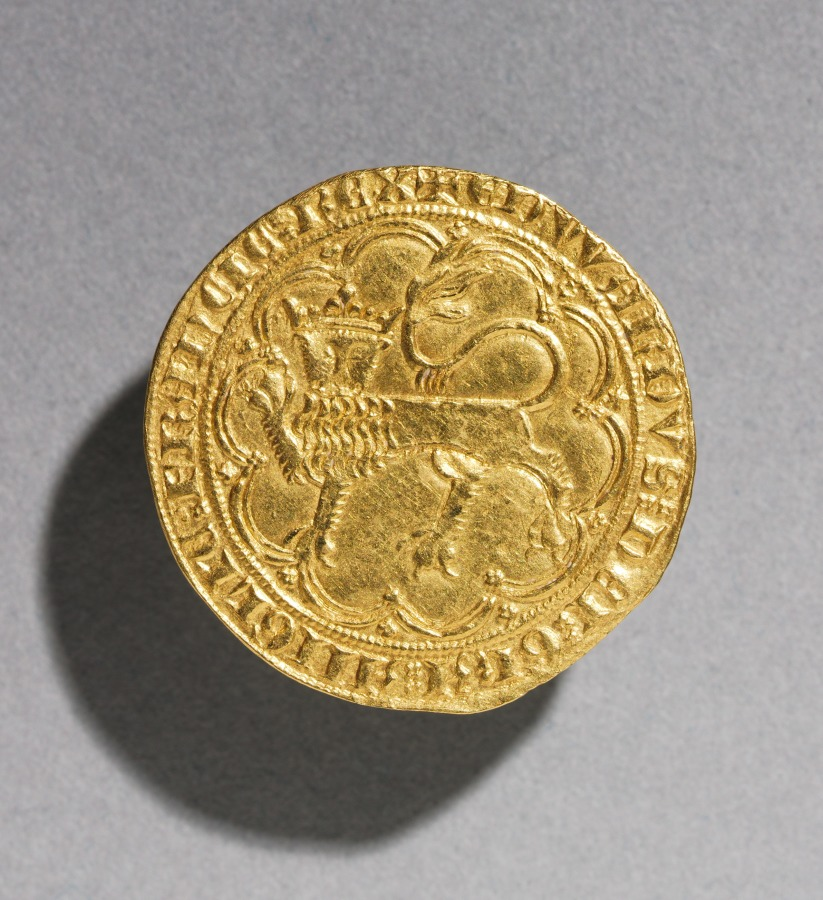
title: Leopard d'Or of Edward III of England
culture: England, Anglo-Gallic, Gothic period, 14th century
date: 1327–1377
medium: gold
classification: Coins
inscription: crowned leopard passant left framed in double arches and inscription: EDVVARDVS:DEI:GRA:ANGLI:FRANCIE:REX.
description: Known as a "Golden Leopard" because of the crowned leopard on one side, this gold coin was minted for Edward III, king of England and France.